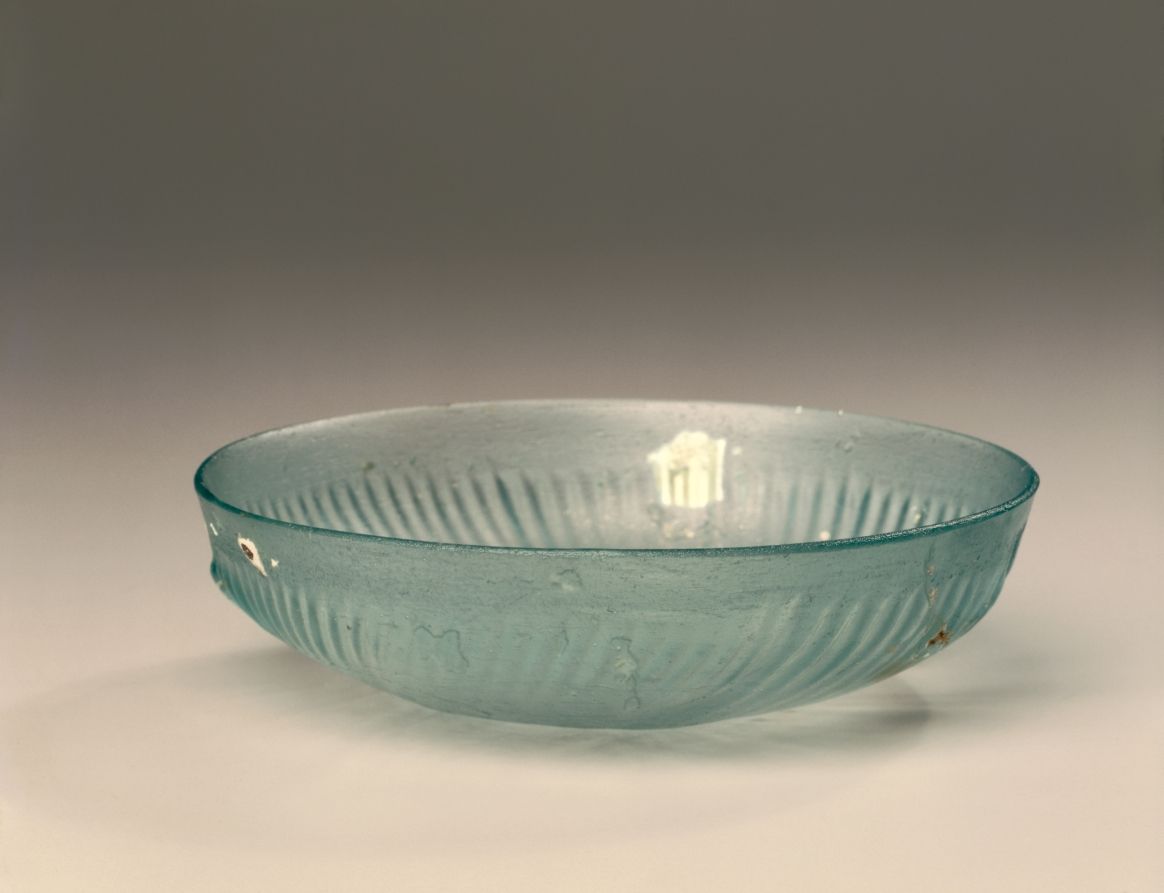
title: Shallow Ribbed Bowl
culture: Roman, Eastern Mediterranean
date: 50 BCE–100 CE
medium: glass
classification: Glass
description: Shallow ribbed glass bowls, often light blue, green, or turquoise in color, are a fairly common ancient glass vessel type. They were likely made by blowing or pressing molten glass into molds, sometimes leaving visible air bubbles within the glass matrix. After cooling, an artisan would rotate the bowl on a wheel or lathe, using a gentle abrasive to smooth out imperfections.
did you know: The Roman shallow ribbed bowl, with central boss, recalls the earlier Greek phiale (libation dish).